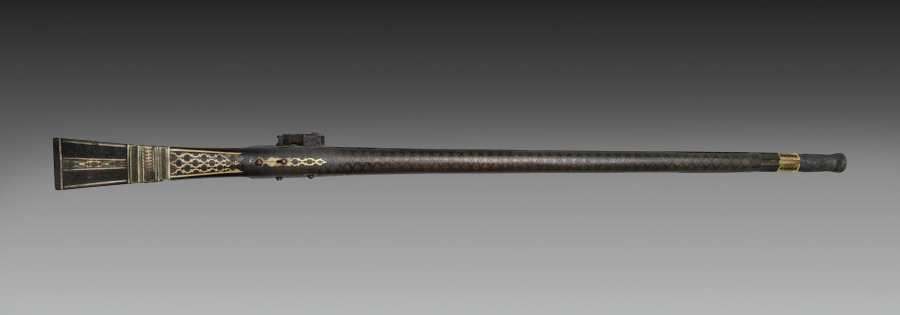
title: Gun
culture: India, Rajput Kypi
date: c. 1800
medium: iron with bone and silver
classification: Arms and Armor